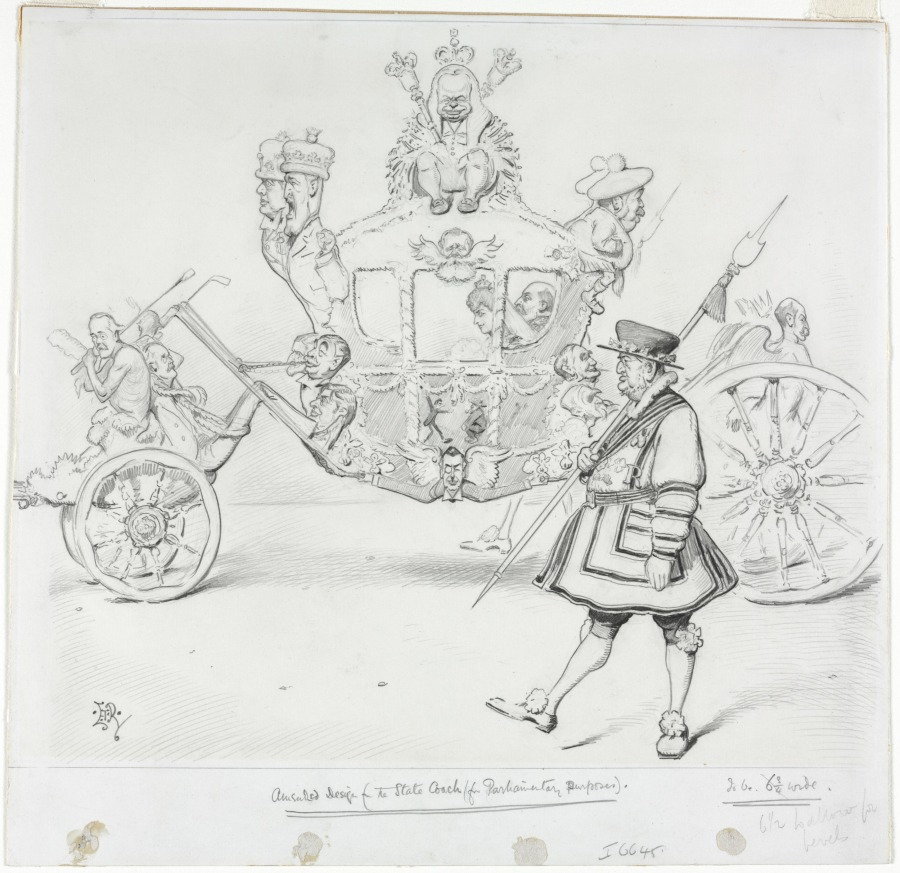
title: The Stagecoach for Parliamentary Purposes (recto) Study for Cab and Front Left Wheel of Coach and Study for Head of Crowned Figure Seated on Top of Coach (verso)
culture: England, late 19th-early 20th century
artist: Edward Tennyson Reed (British, 1860–1933)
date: c. 1889–1933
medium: graphite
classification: Drawing